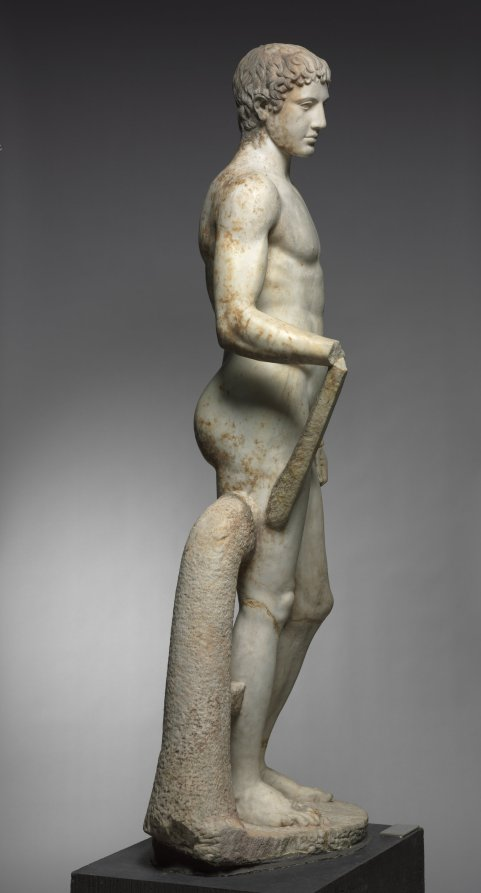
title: Statue of an Athlete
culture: Italy, Roman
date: 1–100 CE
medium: marble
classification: Sculpture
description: This idealized athlete recalls Greek sculptural types invented and popularized during the 400s BC. Large-scale athletes and other sculptures like this were originally created by famous artists as sanctuary dedications. Centuries later, they were widely copied and adapted by Roman sculptors, whose clients sought their own versions of earlier masterpieces. Working in marble rather than bronze, these sculptors added certain elements for stability, such as the struts and the large tree trunk beside the right leg here. Sculptures like this one are profoundly complex, made by and for Romans but descended from Greek ancestors.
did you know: For many years, this sculpture stood in the rotunda of the Cleveland Museum of Art.